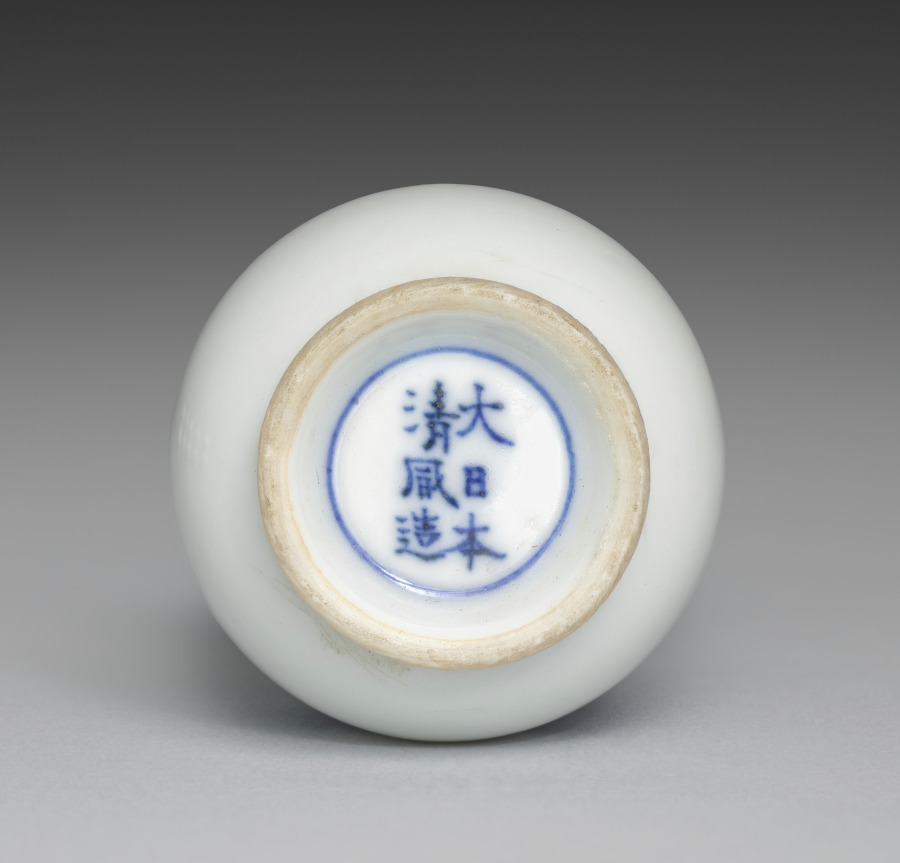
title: Cup from Sake Cups with Dragons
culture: Japan, Meiji period (1868–1912)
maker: Seifū Yohei III (Japanese, 1851–1914)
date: c. 1893–1914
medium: One from a set of six sake cups; porcelain with underglaze blue and iron oxide rims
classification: Ceramic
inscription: 大日本清風造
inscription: 清風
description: Each of these sake cups pictures two backward-looking dragons. The highly stylized creatures resemble jade carvings.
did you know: Seifū Yohei III was inspired by the Chinese mythical animals that were common on porcelain objects made at Jingdezhen in China during the Ming dynasty (1368–1644) and then exported around the world.